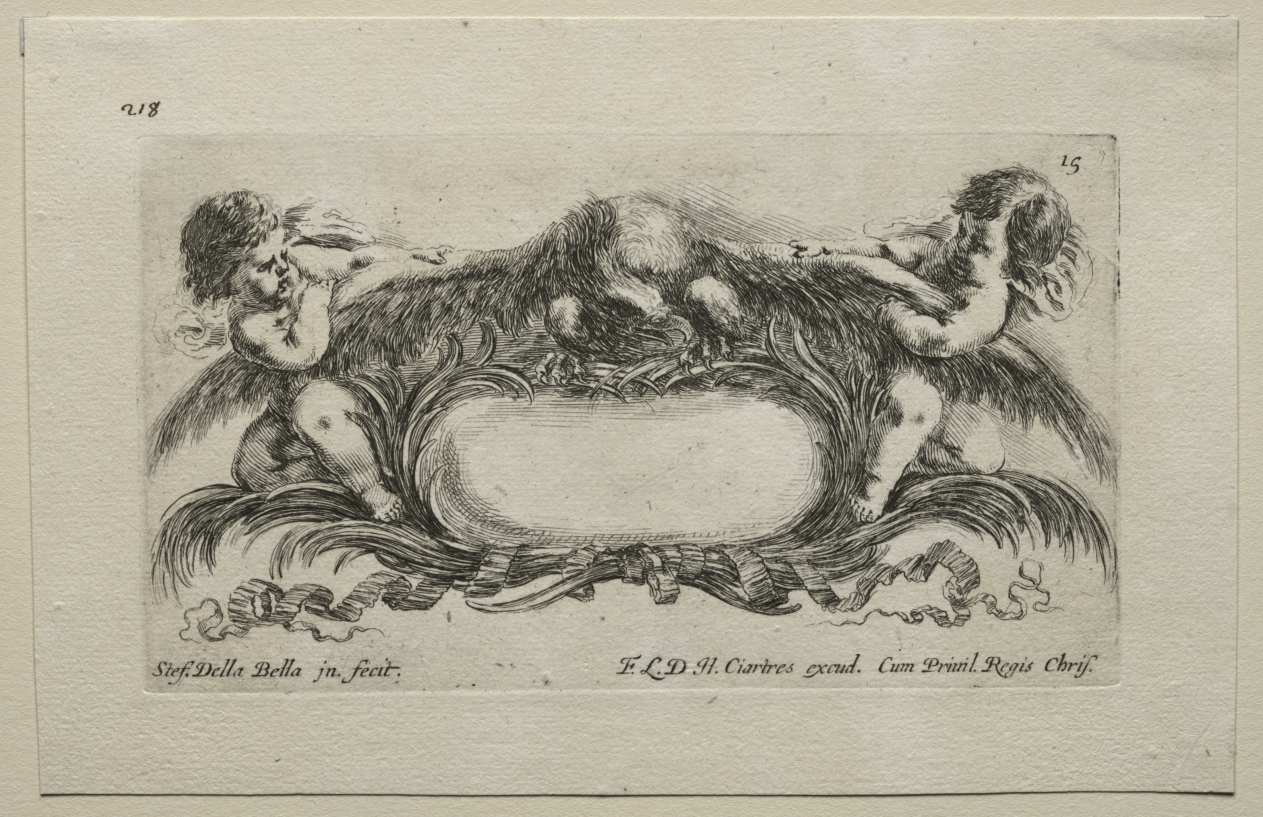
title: Collection of Various Caprices and New Designs of Cartouches and Ornaments: No 15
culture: Italy, 17th century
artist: Stefano Della Bella (Italian, 1610–1664)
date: c. 1642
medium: etching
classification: Print